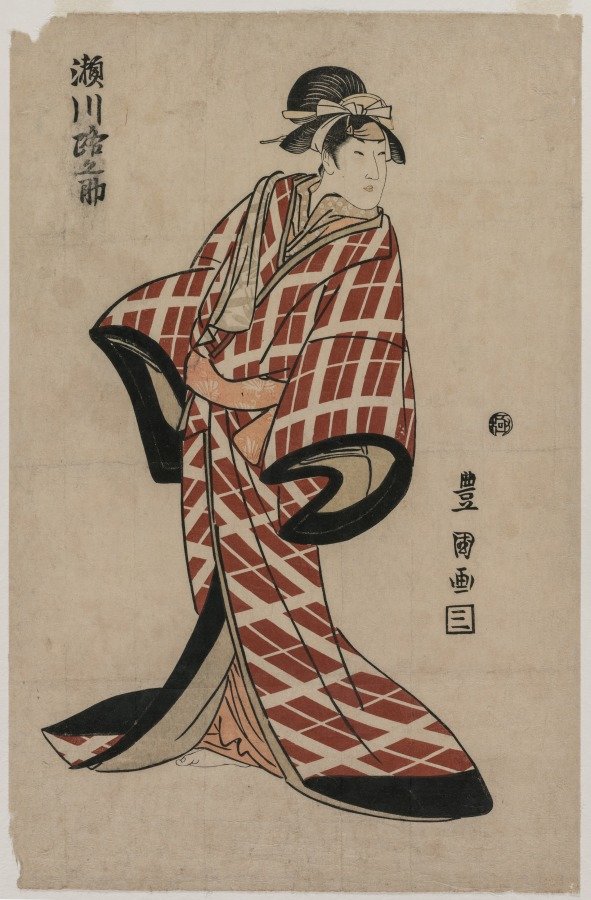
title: Segawa Michinosuke Wearing a Padded Plaid Robe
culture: Japan, Edo period (1615–1868)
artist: Utagawa Toyokuni (Japanese, 1769–1825)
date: c. 1805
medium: color woodblock print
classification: Print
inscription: Signature: Toyokuni ga Censorship Seal: kiwame